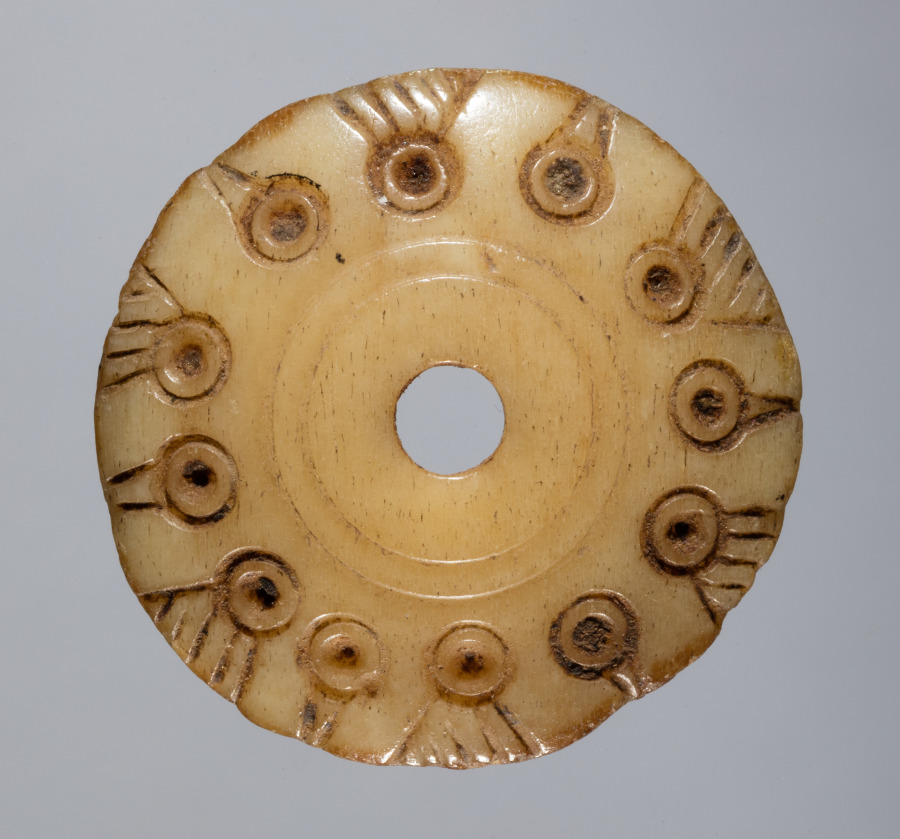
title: Spindle Whorl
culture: Iran, early Islamic period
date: 700s - 900s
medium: bone, incised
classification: Spindle Whorl